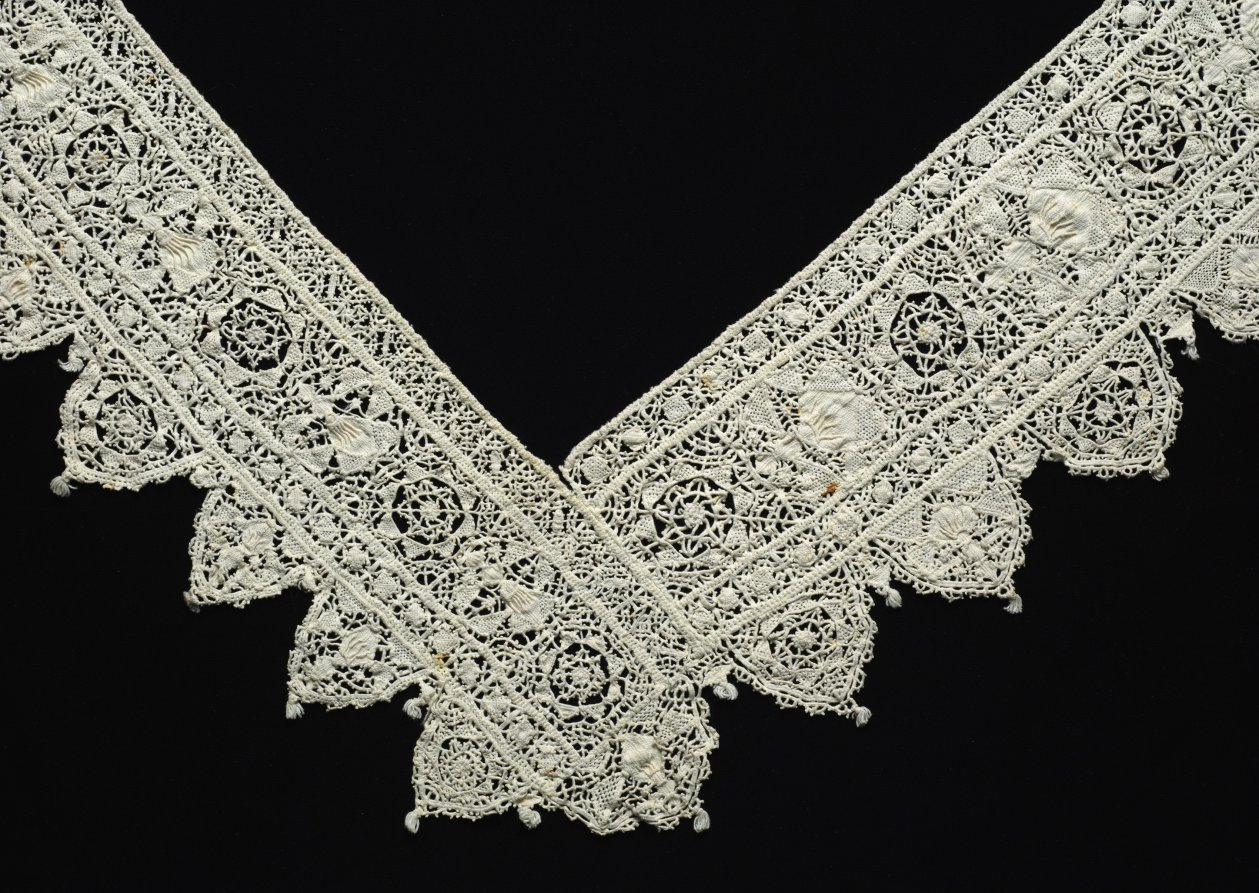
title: Lace Edging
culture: Italy, 1600s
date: 1600s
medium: Linen: needle lace (reticella)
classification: Lace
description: In this piece of lace edging, squares with a geometric design alternate with a motif of a bee, the symbol of the Barberini family.